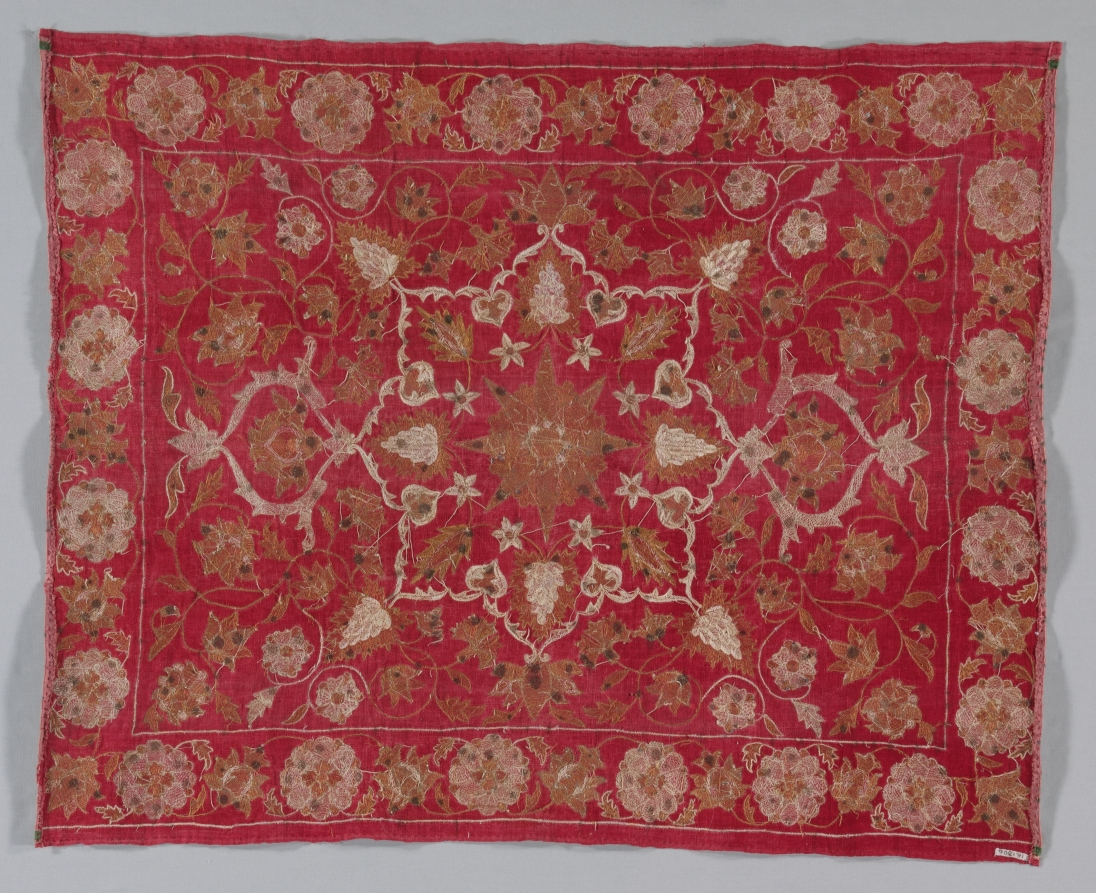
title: Embroidered Textile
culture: Turkey ?, 18th century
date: 18th century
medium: embroidery: silk, and gold and silver filé on silk ground; cotton backing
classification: Embroidery